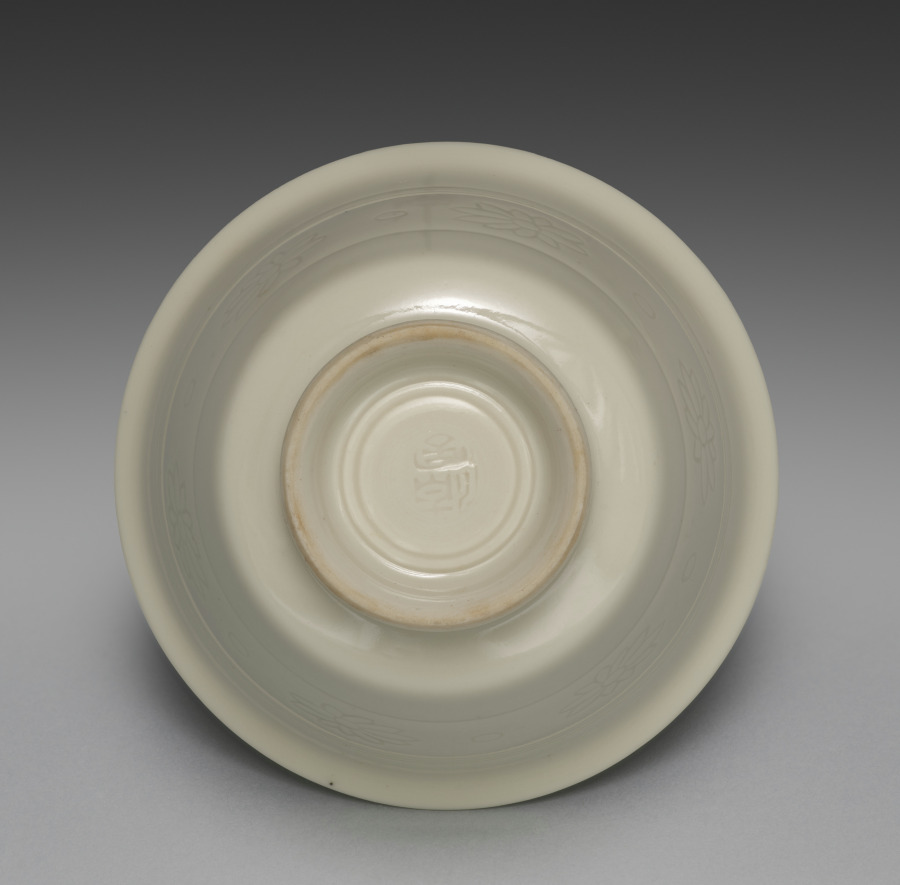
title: Teacup from Teacups with Floral Band Motif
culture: Japan, Meiji period (1868–1912)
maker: Seifū Yohei III (Japanese, 1851–1914)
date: 1893–1914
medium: One from a set of five cups; porcelain with incised decoration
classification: Ceramic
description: The five sencha teacups in this set are decorated with incised flowers and dots between a double band at the top and a single band at the bottom. They are in Yohei III’s creamy taihakuji body and glaze. In their motifs, they are quite similar to an incense burner by Yohei III (see CMA 2022.180), but the flowers are even more simple in design, with no open circle at the center. A label affixed to the side of the box refers to them as “sencha cups in emulation of Korean white [ware].” The reference to Korean ware indicates that even though Yohei was more directly inspired by Qing-dynasty wares from the Dehua kilns in Fujian Province in developing his porcelain clay and glaze for works such as these, the general understanding of the continental models still placed them, at least in terms of color, among pieces broadly associated in Japan with Korean white wares. The delicate cups are thinly potted, so they have a highly desirable translucency.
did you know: The delicate cups in this set are thinly potted, so they have a highly desirable translucency.